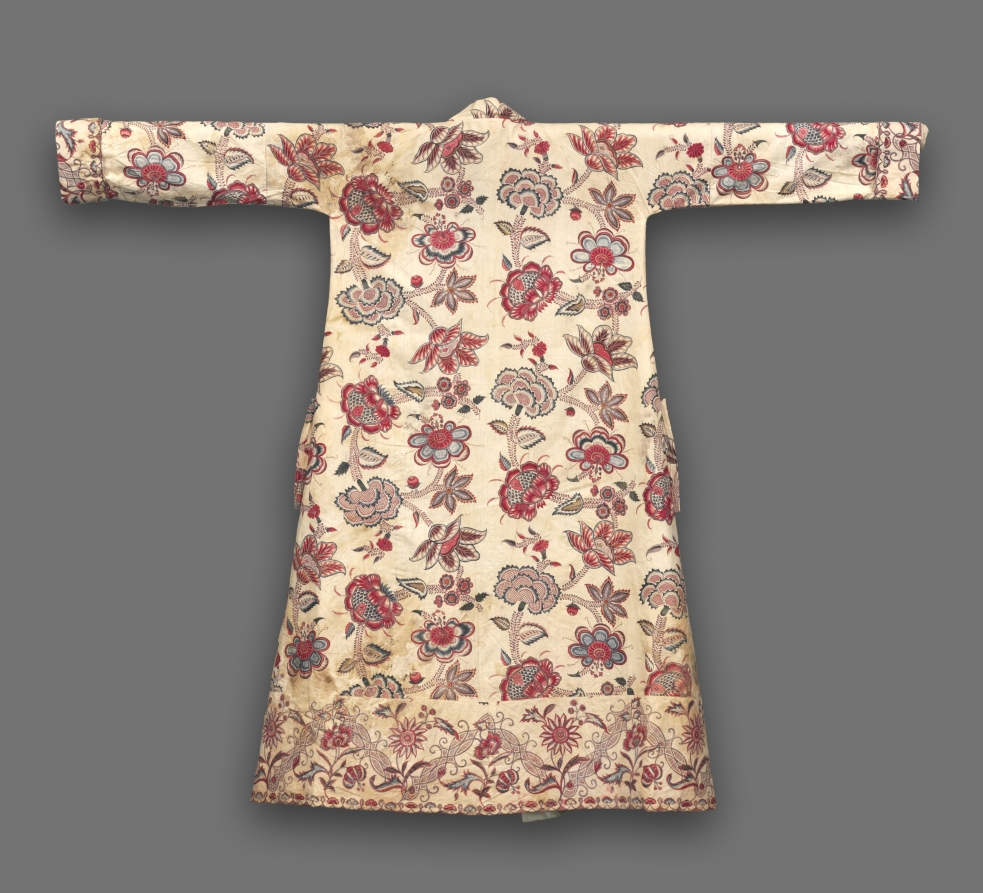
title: Man's Morning Coat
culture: India, Mughal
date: 1700–1750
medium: cotton: tabby weave, resist-dyed (mordant resist and batik); applied gold leaf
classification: Garment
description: Much of the Mughals’ wealth derived from the international export of textiles, which became increasingly fashionable throughout Europe and America during the 18th century. This garment was made in India for the aristocratic French market. The floral designs inspired by the southern Indian dyed fabrics known as palampore have been enlivened by labor-intensive gilding and burnishing.